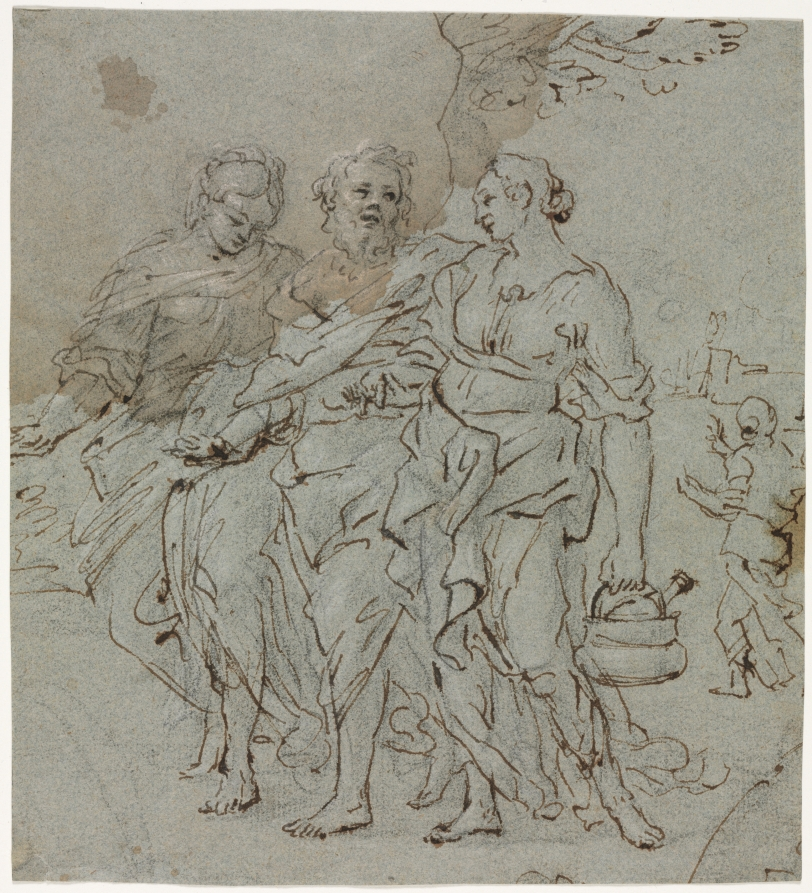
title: Lot and His Daughters (recto)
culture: Italy, 17th century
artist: circle of Pietro da Cortona (Italian, 1596–1669)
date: 1600s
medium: pen and brown ink over black chalk(?), heightened with traces of white gouache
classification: Drawing